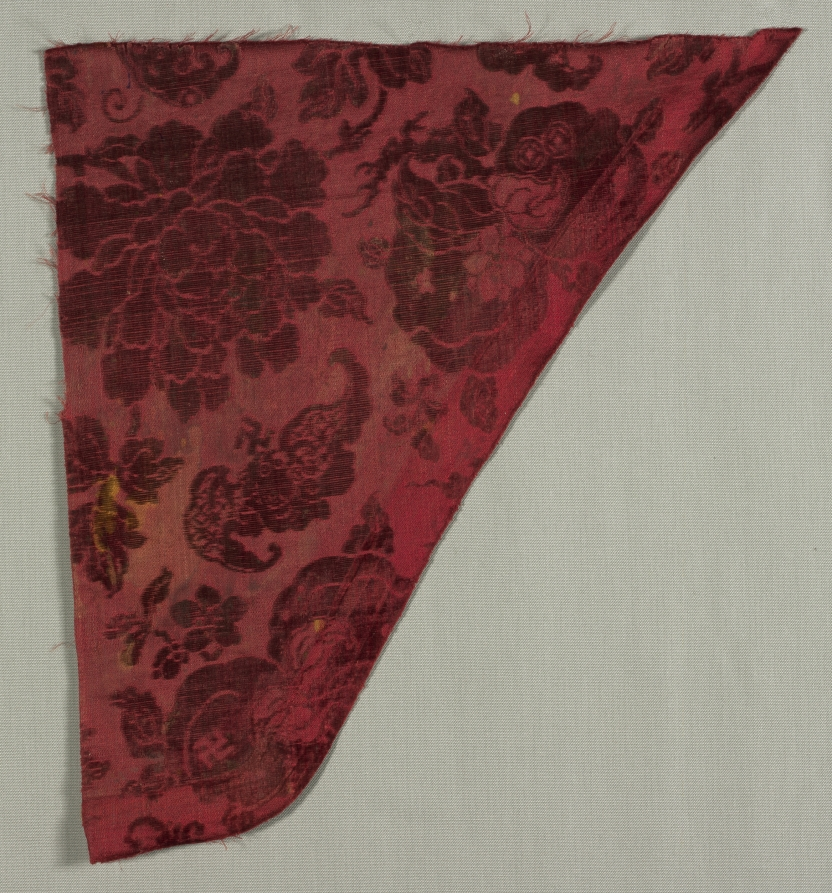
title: Silk Fragment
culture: China, Qing dynasty (1644–1911)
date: 1700s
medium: velvet (cut and voided)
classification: Velvet